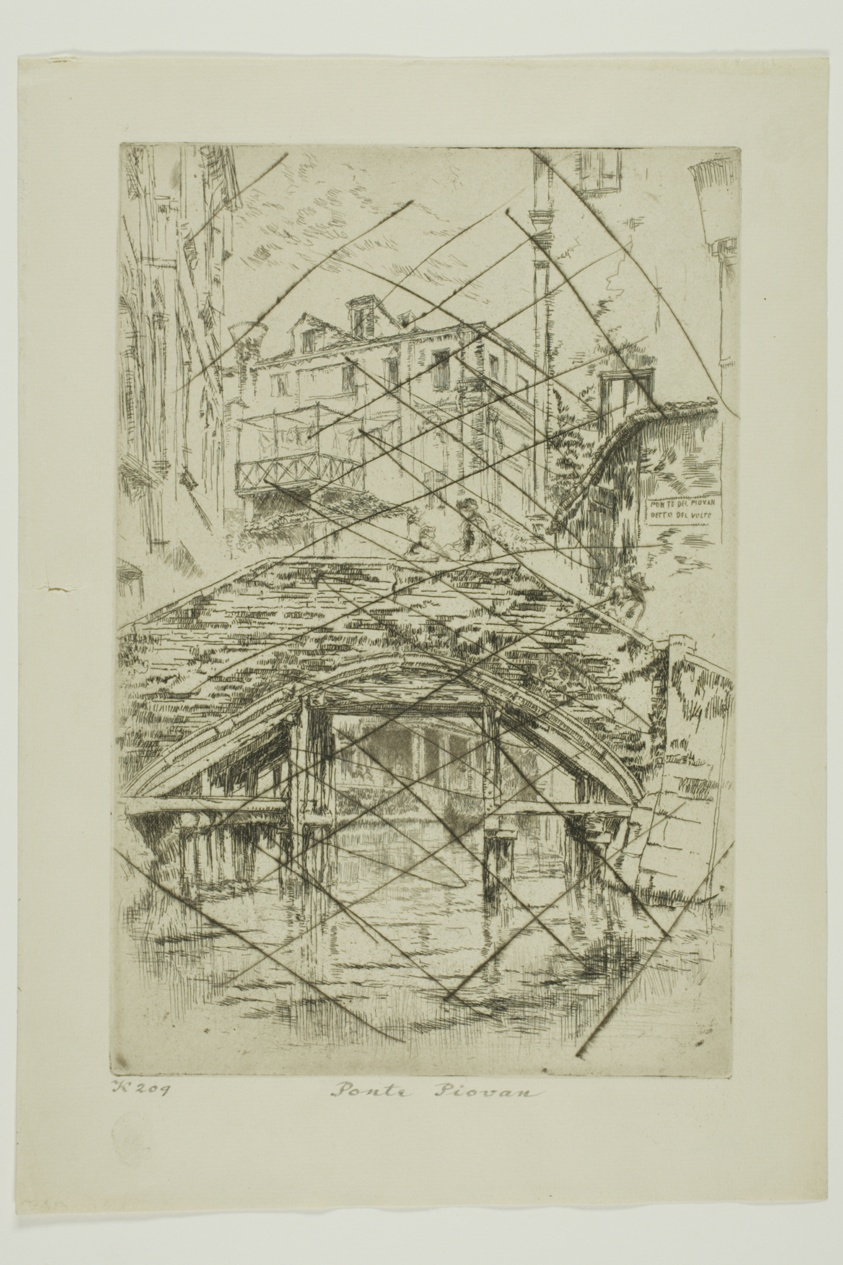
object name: Print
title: Ponte del Piovan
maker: James McNeill Whistler (American, 1834-1903)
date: 1879/80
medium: Etching and drypoint with foul biting, with drypoint cancellation, in black ink on ivory laid paper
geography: United States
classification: etching; print; prints and drawing; foul biting; drypoint; paper